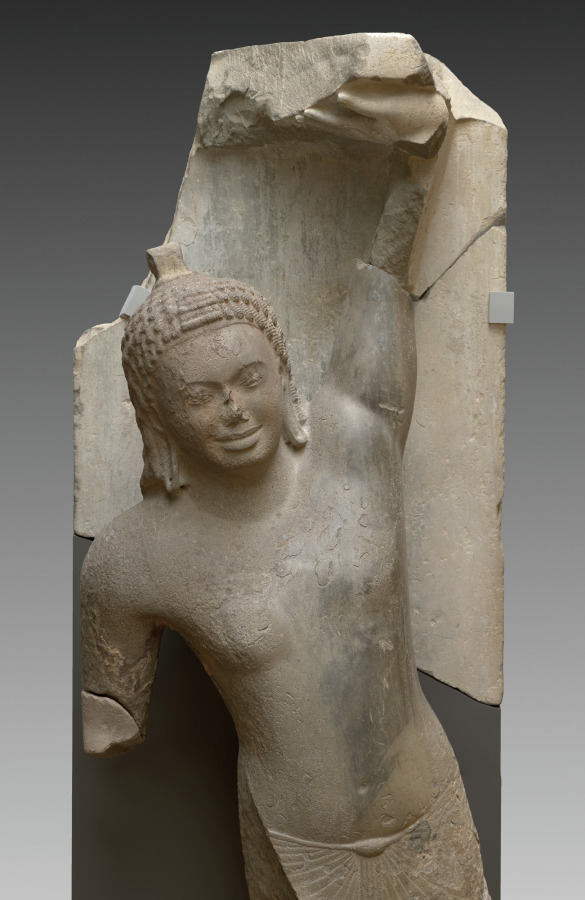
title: Krishna Lifting Mount Govardhan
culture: Southern Cambodia, Takeo Province, Phnom Da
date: c. 600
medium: Sandstone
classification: Sculpture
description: This masterwork of early Cambodian sculpture shows the Hindu god Krishna effortlessly holding aloft a mountain to protect his fellow villagers and herds from torrential storms sent by a jealous old god. It is one of eight monumental monolithic figures recovered from a two-peaked mountain in the floodplains of the Mekong River delta, on the outskirts of the ancient urban center of Angkor Borei.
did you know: Gold earrings were once fastened to the sculpture using holes in the figure's earlobes.